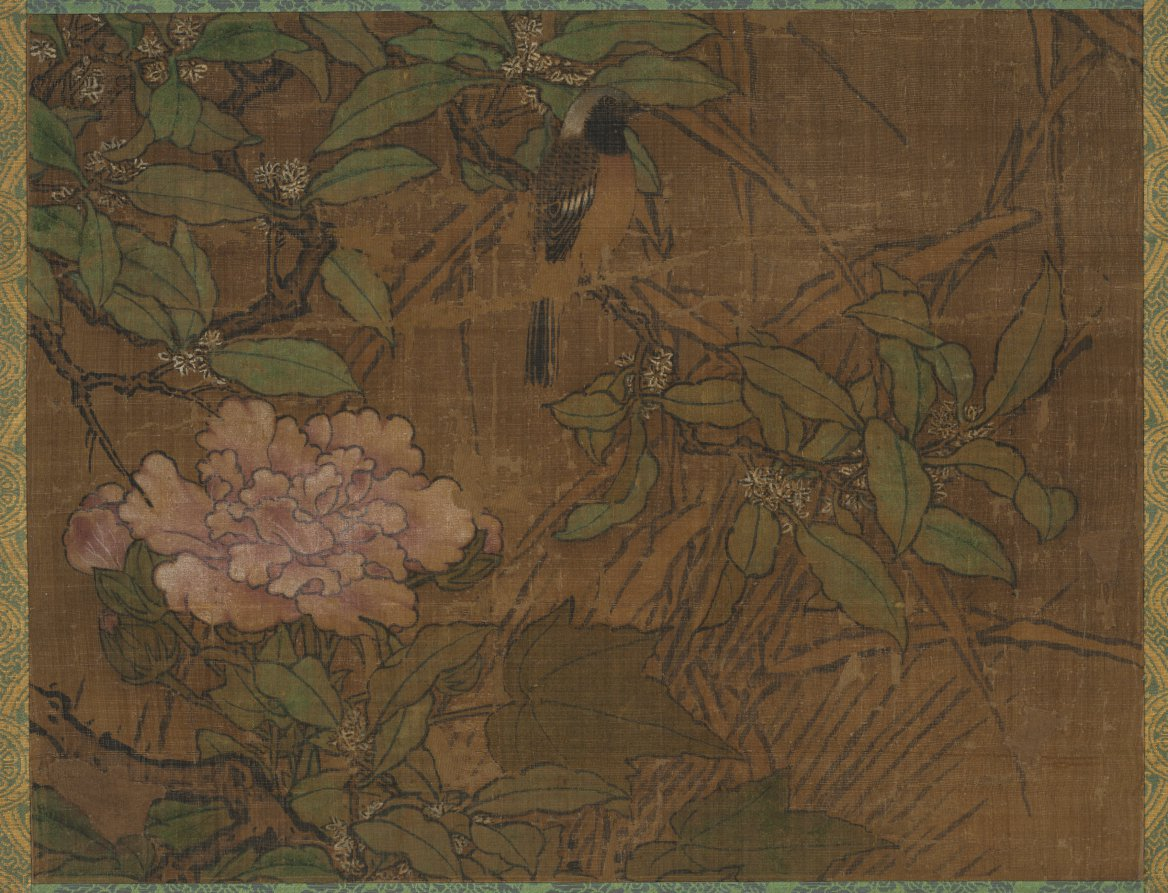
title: Birds and Flowers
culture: Japan, Muromachi period (1392–1573)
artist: attributed to Sesshū Tōyō (Japanese, 1420–1506)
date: mid-1400s–early 1500s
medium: Hanging scroll from a triptych; ink and color on silk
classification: Painting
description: This is one of two paintings possibly by Sesshū Tōyō. They once flanked a central scroll with an ink landscape. The unbalanced nature of the compositions, however, suggests they may be images recycled from larger paintings. The one with sweet osmanthus and hibiscus is an autumn scene, the other is a summer scene with daylilies and gardenias. Folding screens often contrast two seasons or depict all four across a single pair of screens. Sesshū’s works were sufficiently prized that repurposing them in fragmentary form to display in an alcove of a luxurious room would not be an unusual choice.